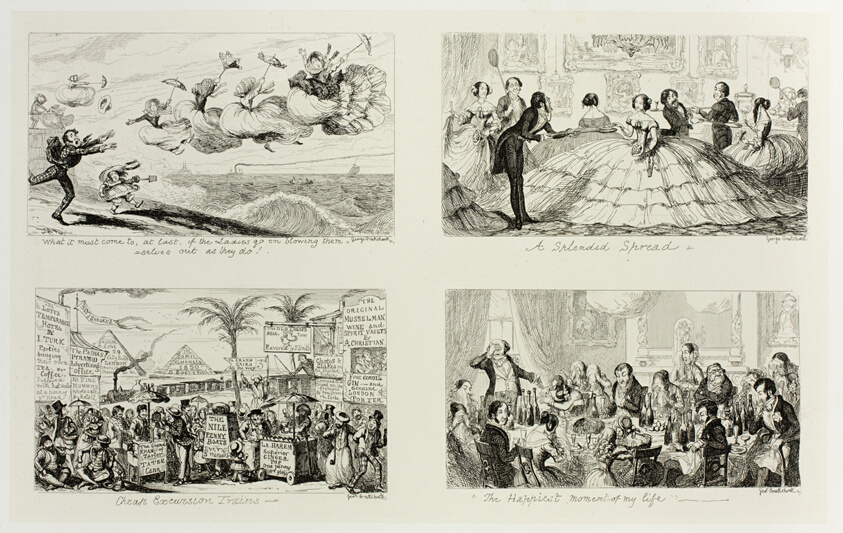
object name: Print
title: What It Must Come To, At Last, if the Ladies Go On Blowing Themselves Out as They Do! from George Cruikshank's Steel Etchings to The Comic Almanacks: 1835-1853 (top left)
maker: George Cruikshank (English, 1792-1878); published by Pickering & Chatto (English, 19th century)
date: 1850, printed c. 1880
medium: Four steel etchings in black on cream India paper, laid down on off-white card (chine collé)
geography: England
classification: etching; paper; print; prints and drawing